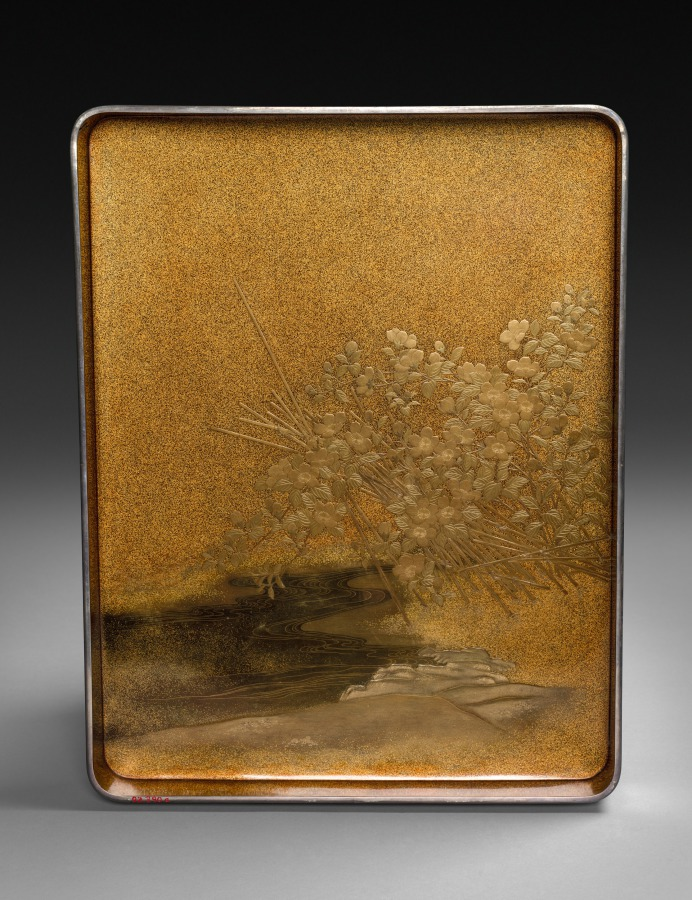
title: Document Box (Ryōshibako) with Chrysanthemum and Plum (lid)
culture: Japan, Meiji period (1868–1912)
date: late 1800s-early 1900s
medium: gold lacquer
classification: Lacquer